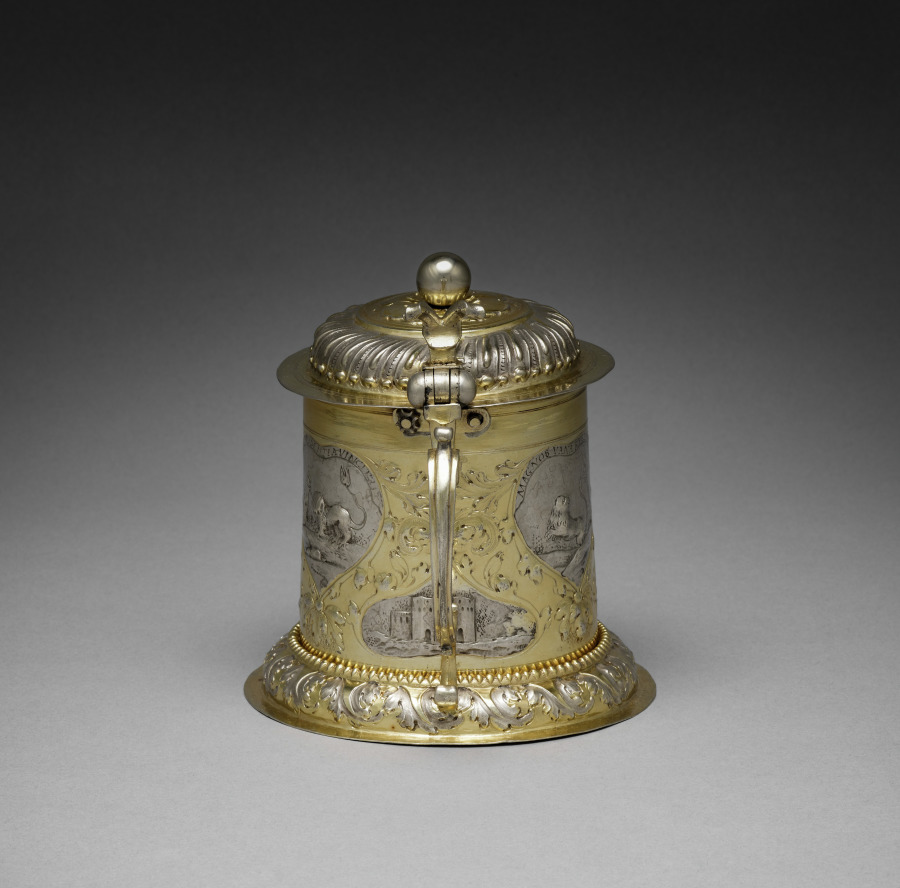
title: Tankard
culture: Germany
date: 1600s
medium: silver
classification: Silver